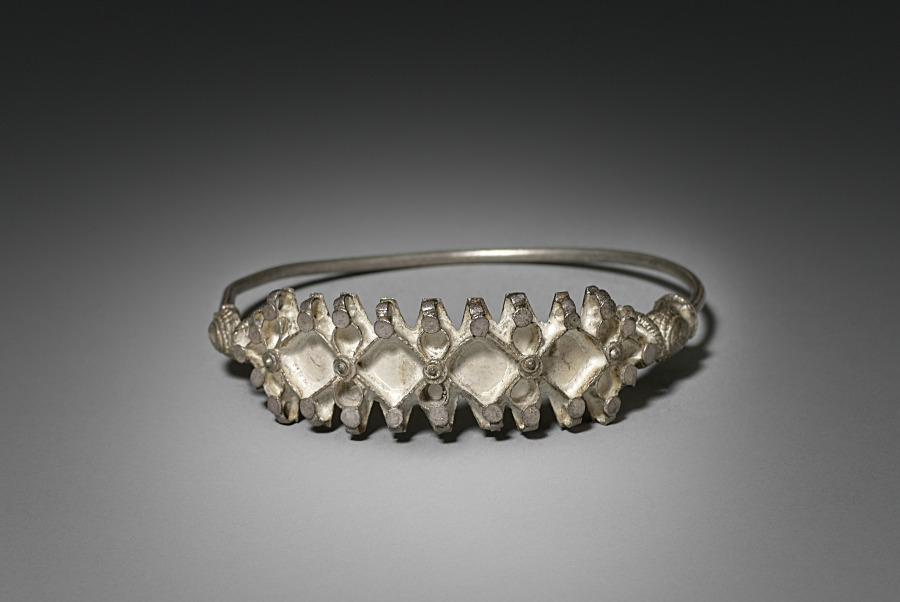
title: Nose Ring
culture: India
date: early 1900s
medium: silver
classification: Jewelry